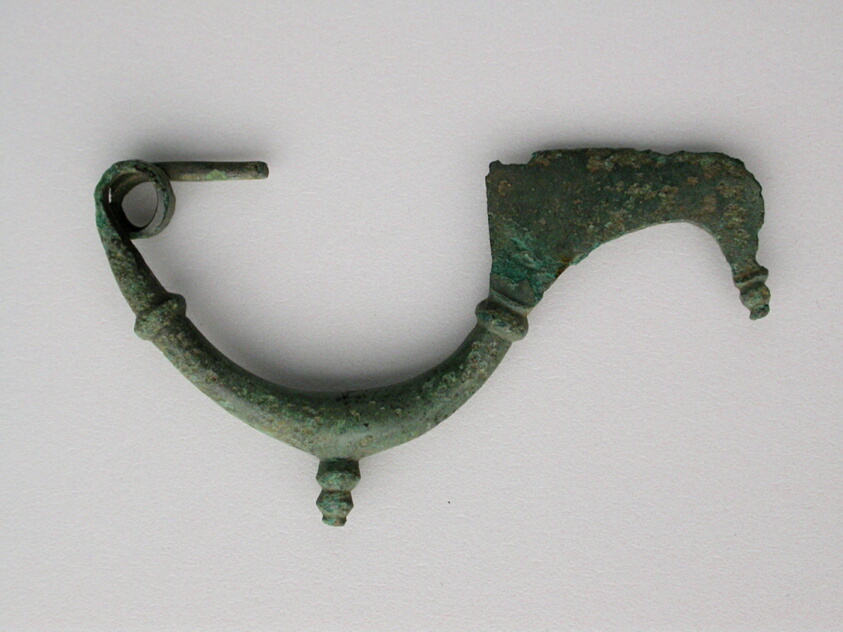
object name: Costume and Accessories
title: Bow Fibula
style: geometric, ancient, greek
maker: Greek; Thessaly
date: Geometric Period (800–600 BCE)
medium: Bronze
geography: Greece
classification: votive offering; jewelry; ex-voto; fibula; costume